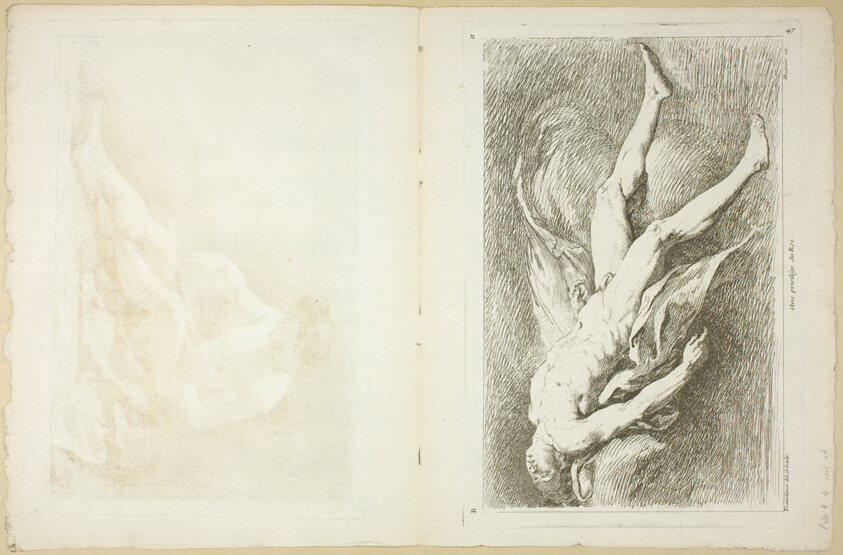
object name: Print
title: Page 46 and Page 47, from Seconde Livre de Figures d’Académies Gravées en Partie par les Professeurs de l’Académie Royale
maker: Jean-Baptiste Perronneau (French, 1715-1783); after Carle van Loo (French, 1705-1765); Pierre Charles Trémolières (French, 1703-1739); printed by Gabriel Huquier (French, 1695-1772); published by Charles-Antoine Jombert (French, 1712-1784)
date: published 1745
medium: Etching on ivory laid paper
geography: France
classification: etching; print; prints and drawing